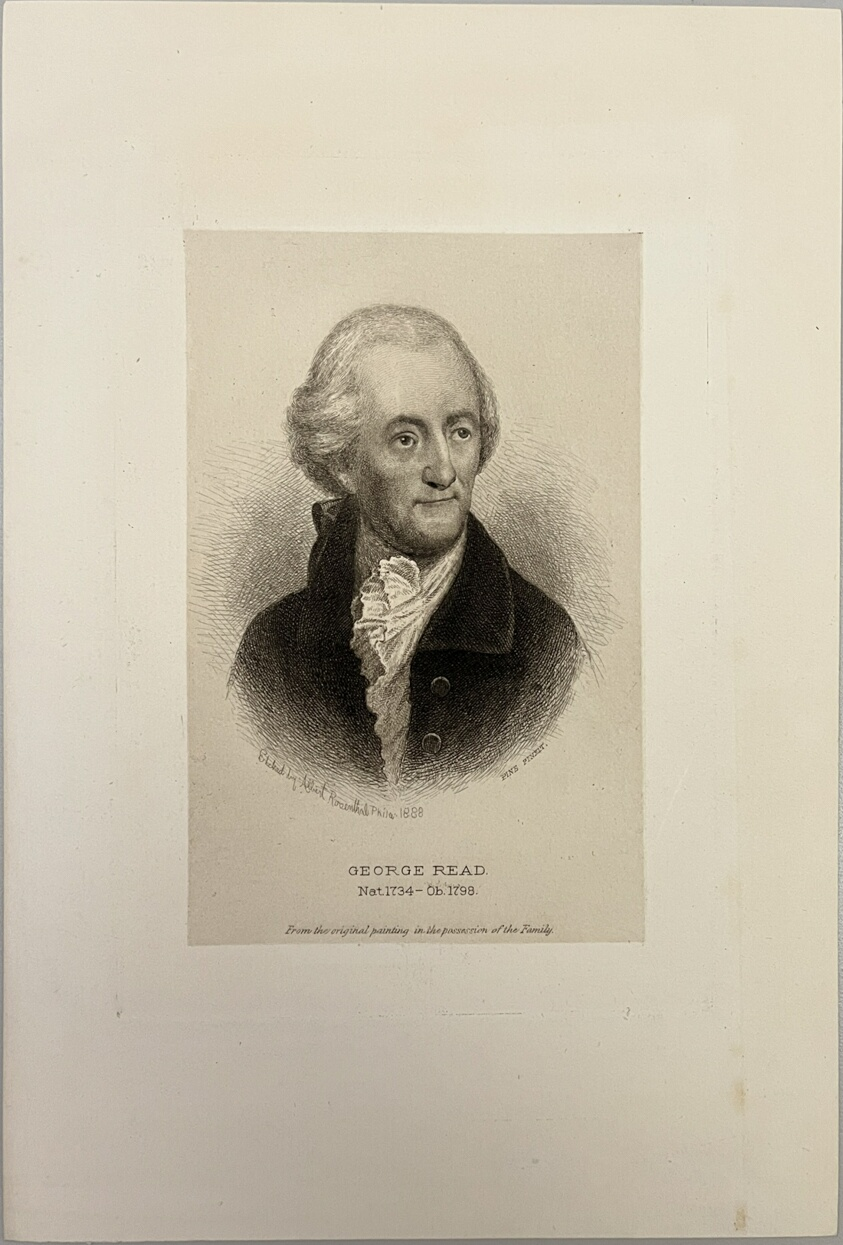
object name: Print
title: George Read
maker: Albert Rosenthal (American, 1863-1939); after Robert Edge Pine (British, 1742-1788)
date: 1888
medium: Etching on paper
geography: United States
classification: reproduction; print; prints and drawing